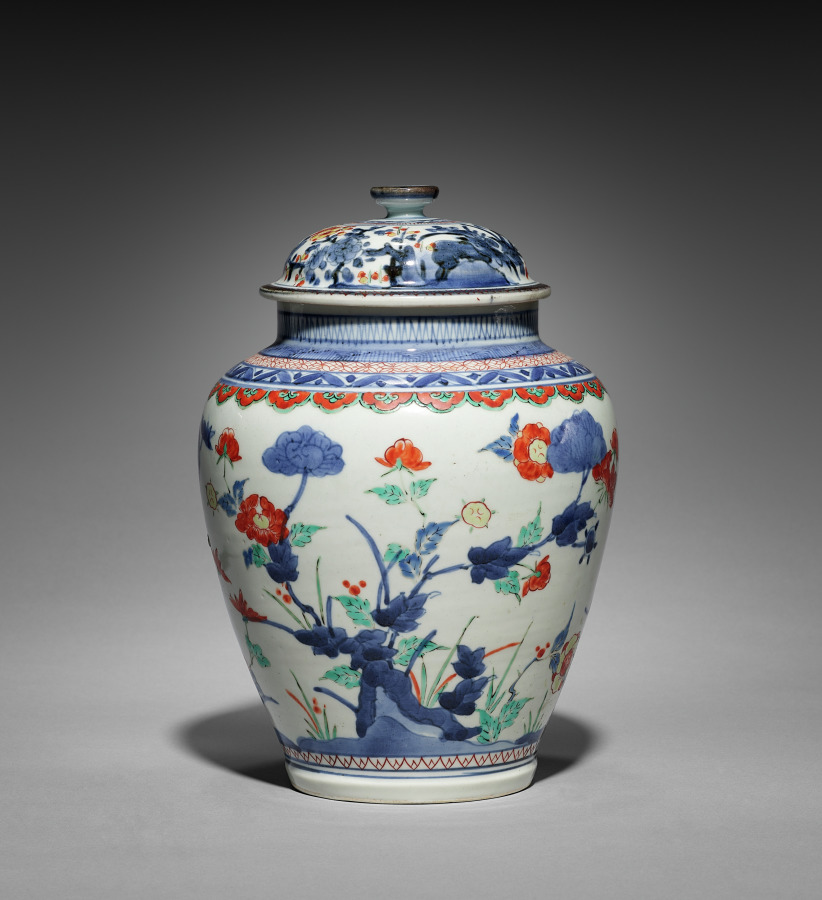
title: Covered Jar with Chrysanthemums, Peonies, and Plum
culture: Japan, Edo period (1615–1868)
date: late 1600s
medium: porcelain with underglaze blue and overglaze color enamel (Hizen ware, Kakiemon type)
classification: Ceramic